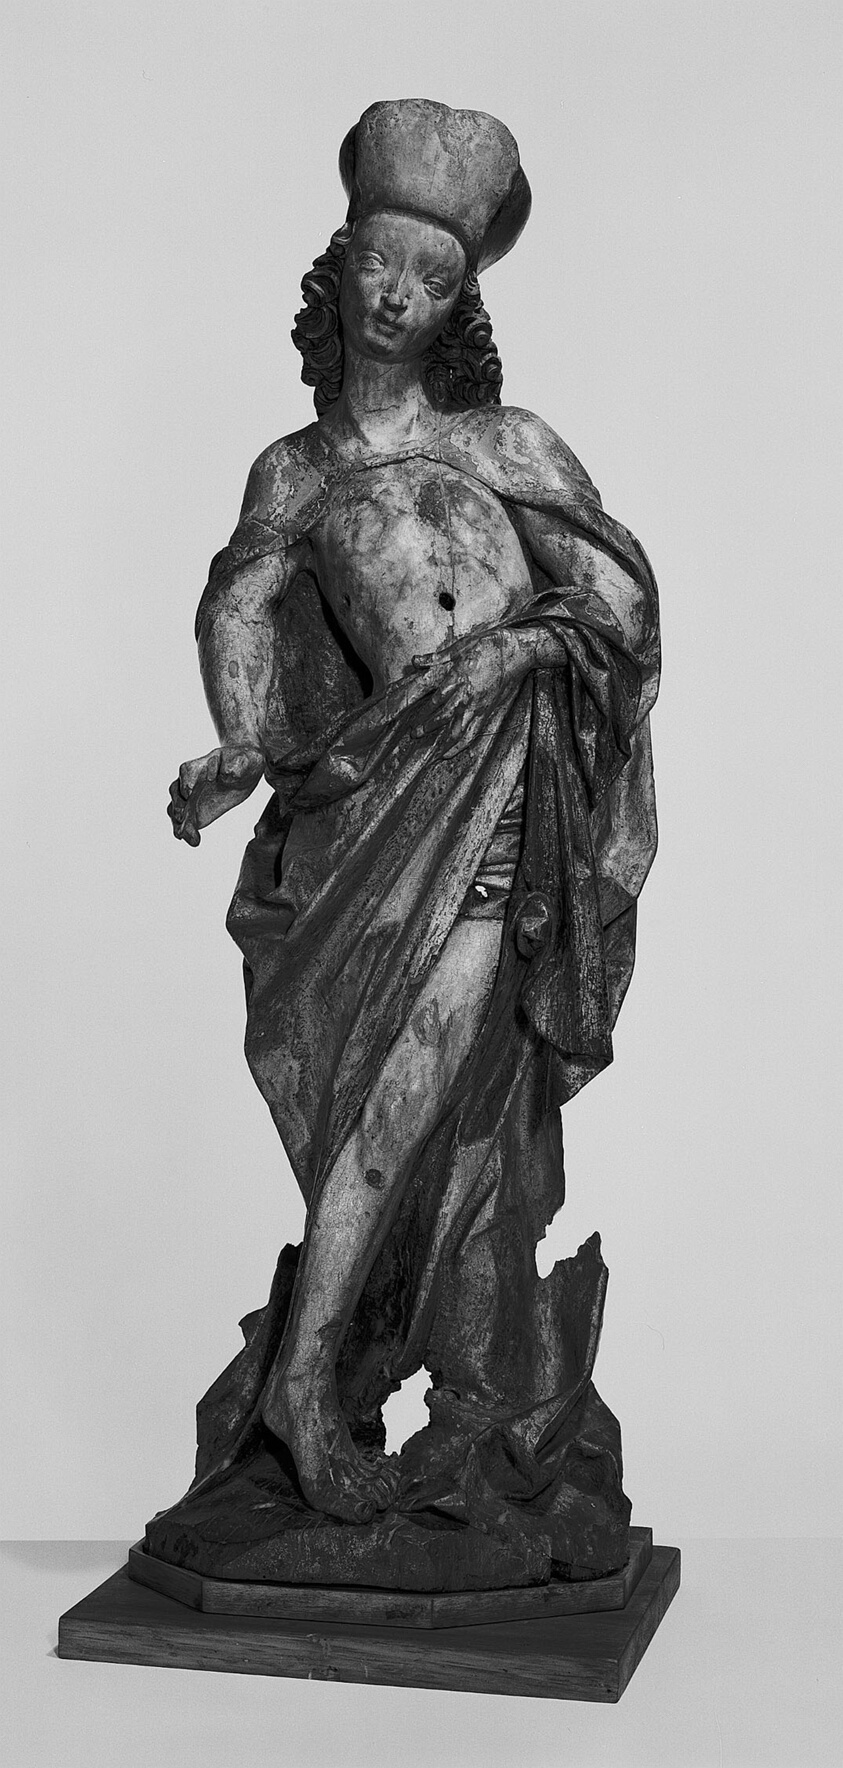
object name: Sculpture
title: Saint Sebastian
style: 15th century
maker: German; Upper Rhine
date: c. 1475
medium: Wood with traces of paint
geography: Germany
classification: sculpture; large scale; figure; sculpture/wood; wood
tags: saints, armor, Christian subjects, Christianity, man, religion, religious, religious figures, sculpture, soldiers